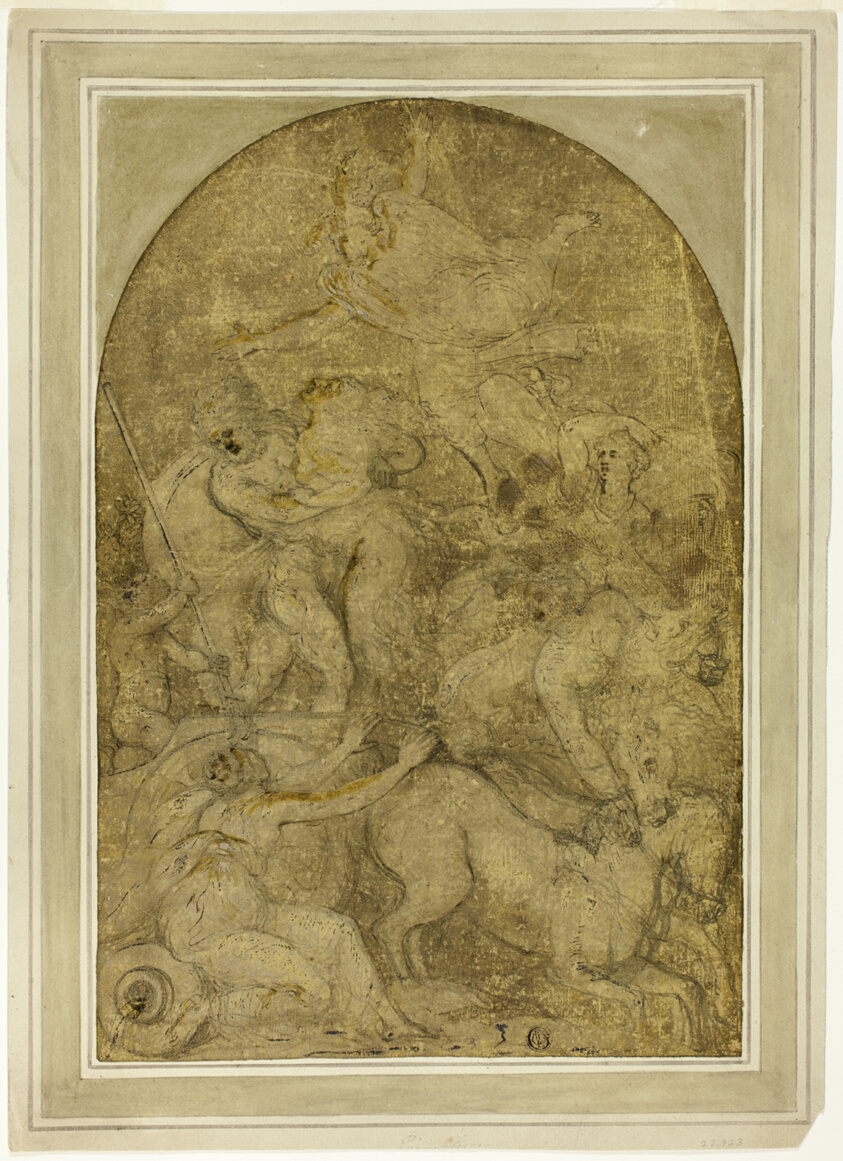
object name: Drawing and Watercolor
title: Rape of Proserpina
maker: Unknown Artist; Italian, mid-16th century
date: 1550/59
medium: Pen and black ink with brush and brown wash, heightened with lead white (oxidized), on lunette-shaped cream laid paper prepared with yellow wash, squared in graphite, laid down on cream laid card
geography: Italy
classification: ink with wash; drawings (visual works); prints and drawing